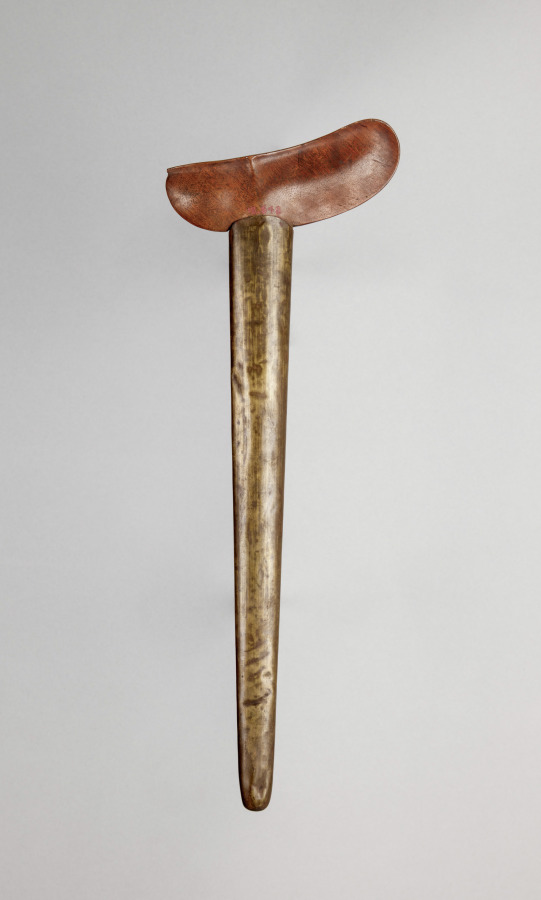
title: Sword (Kris)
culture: Java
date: 1800s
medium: iron with carved wooden handle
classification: Arms and Armor